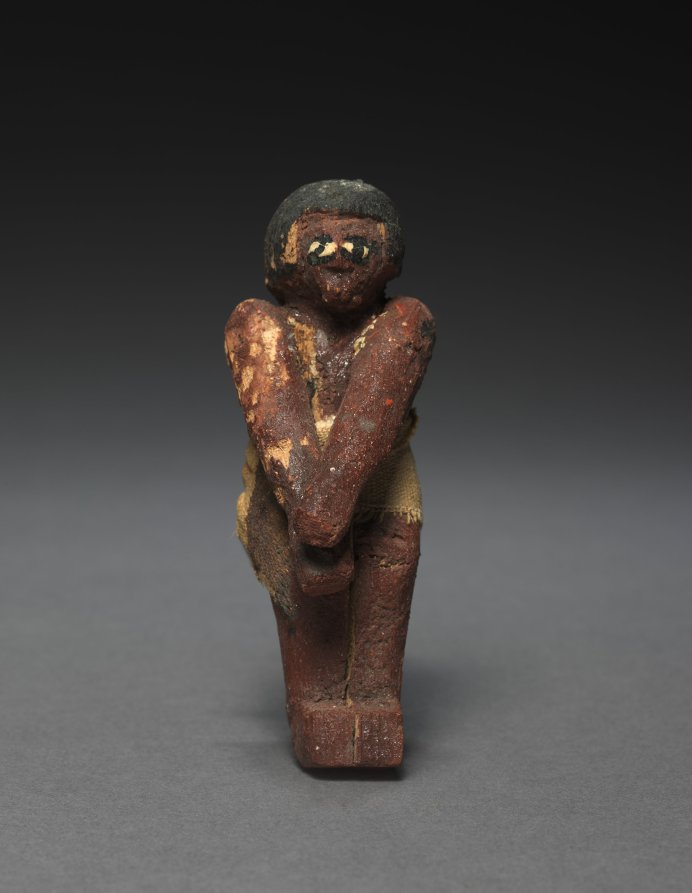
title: Seated Model Sailor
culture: Egypt, Middle Kingdom (2040–1648 BCE), Dynasties 11–12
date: c. 2000–1000 BCE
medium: painted sycamore fig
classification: Funerary Equipment